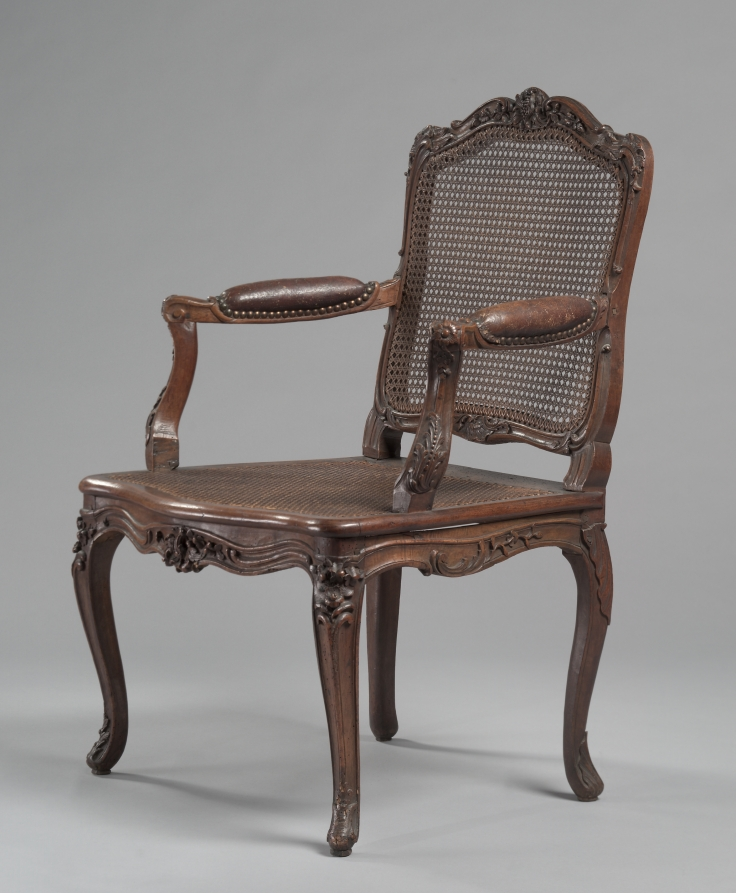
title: Armchair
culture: France, 18th century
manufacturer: René Cresson (French, c. 1705–c. 1749)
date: c.1740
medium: carved wood, cane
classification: Furniture and woodwork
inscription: signed underneath on strip across back: "CRESSON LAINE" (the trademark for René Cresson).